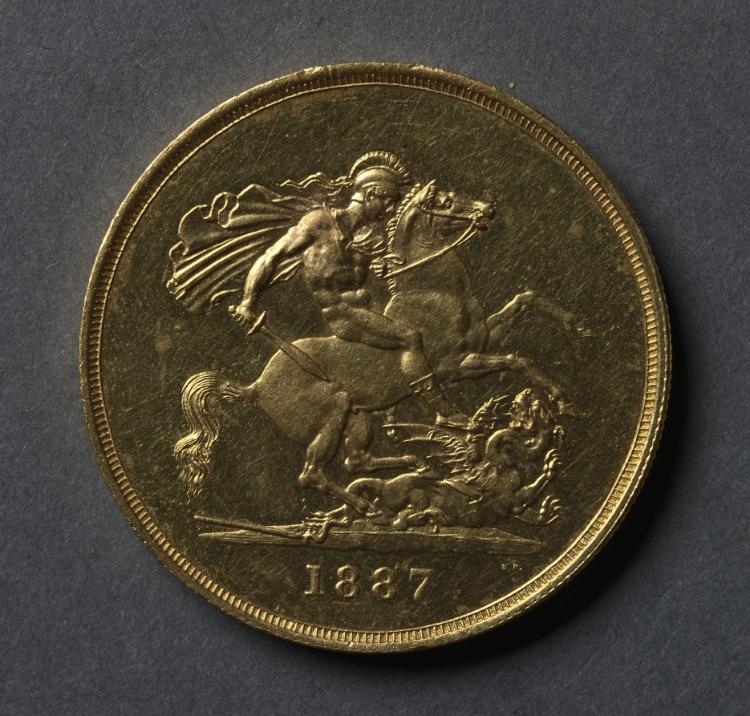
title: Five Pound Piece: St. George and the Dragon (reverse)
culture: England, Victoria, 1837-1901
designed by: after Benedetto Pistrucci (Italian, 1784–1855)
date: 1887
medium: gold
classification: Coins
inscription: below: 1887.